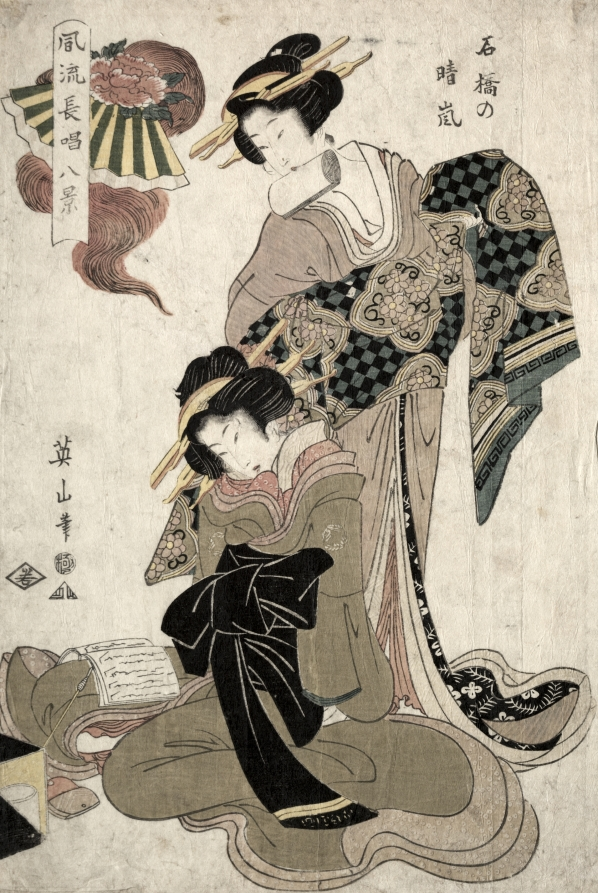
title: Haze on a Clear Day at Stone Bridge (From the series Eight Elegant Views of Chanted Accompanimnets for Kabuki Plays)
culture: Japan, Edo period (1615–1868)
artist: Kikukawa Eizan (Japanese, 1787–1867)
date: early 1810s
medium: color woodblock print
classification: Print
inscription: Signature: Eizan hitsu